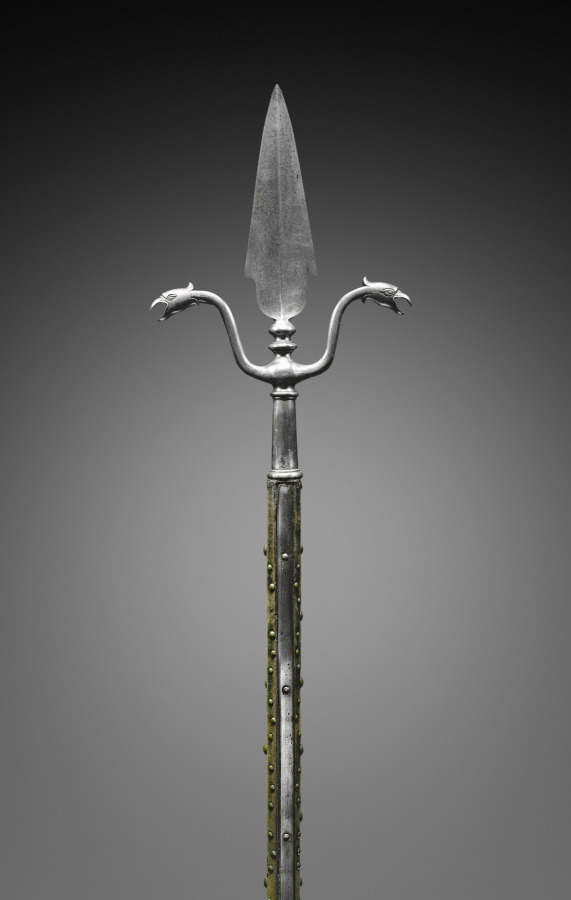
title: Linstock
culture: France, 17th century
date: c. 1600–25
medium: steel; octagonal wood haft covered with green velvet, brass studs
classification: Arms and Armor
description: This specialized staff weapon was used primarily to ignite the charge in pieces of artillery. The two lateral projections ending in eagles' heads are actually clips designed to hold the smoldering matches that allowed the firer to stand a little further from the cannon. The short, leaf-shaped blade allowed the linstock to be used as a weapon if necessary.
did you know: The tapestries and weaponry adorning the walls of the Armor Court are not props. Located near the portrait of Agostino Barbarigo, this linstock hangs to the far right of a grouping of weapons. The blade ends in a double snake design and is attached to a solid wood handle.